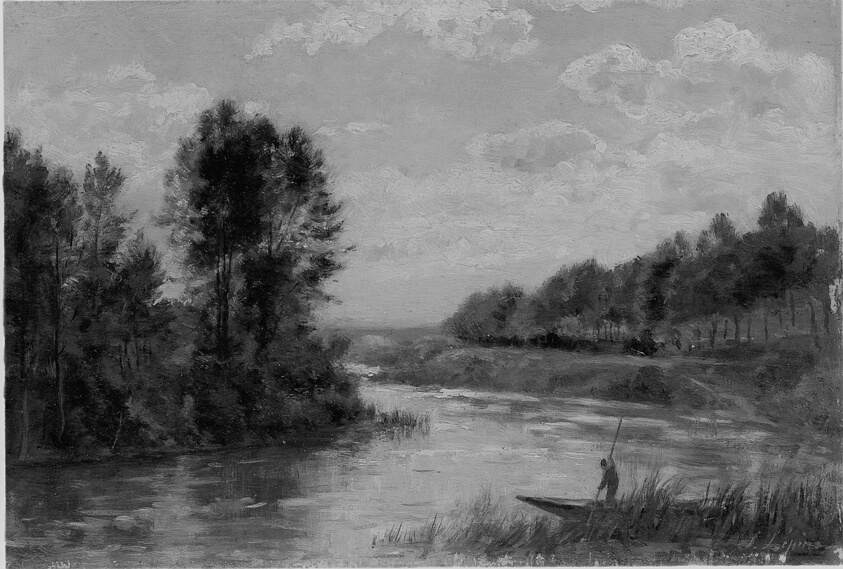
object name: Painting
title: A Stream in France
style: nineteenth century, 19th century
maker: Stanislas Lépine (French, 1835–1892)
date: c. 1880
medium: Oil on panel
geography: France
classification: oil on panel; paint; oil paintings (visual works); french; painting; european painting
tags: streams, boatman, boats, bushes, clouds, foliage, landscape, nature, sky, trees, water